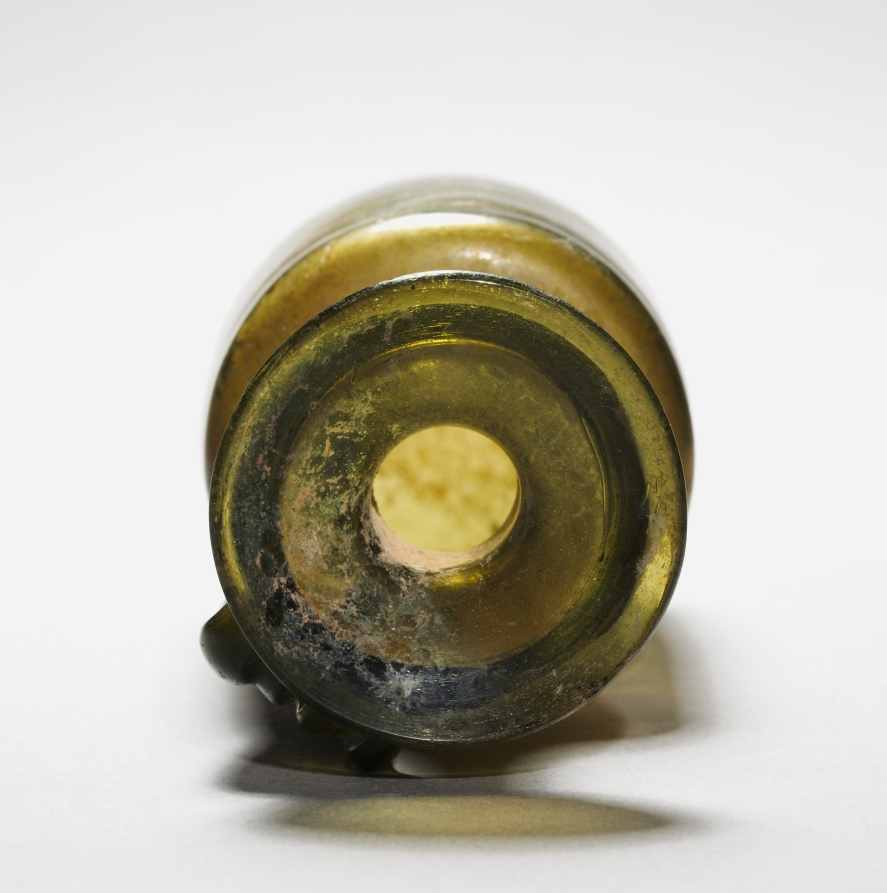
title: Pitcher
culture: Syro-Palestinian, Roman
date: 200–400 CE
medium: glass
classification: Glass